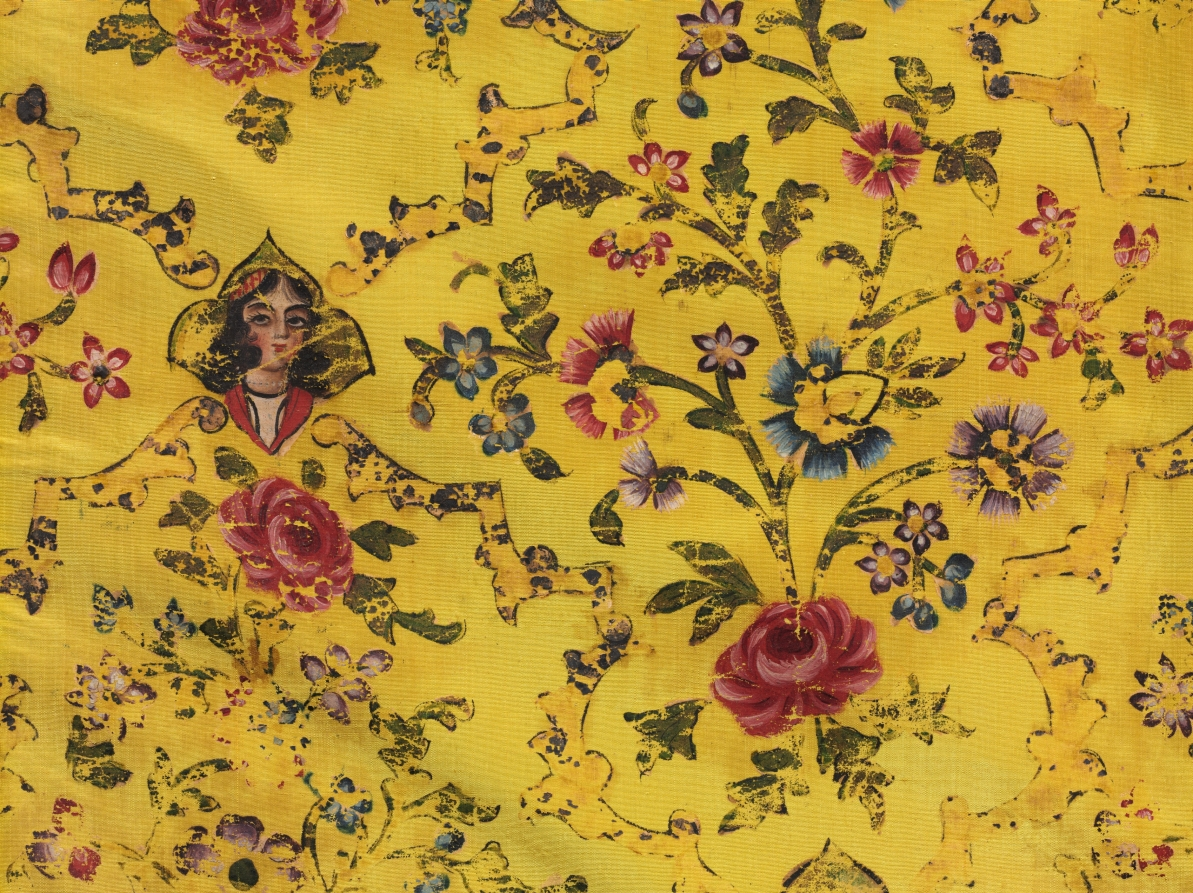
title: Wall cover with flora, peacocks, and portrait medallions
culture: Iran, Qajar period (1779-1925)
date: 1800s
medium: taffeta, hand-painted, block-printed: silk and pigments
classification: Textile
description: The European fashion of installing Chinese export silks with painted decoration as luxurious wall coverings may have inspired this exceptional Iranian silk. European engravings, which had flooded the Iranian market by the 19th century, most likely inspired the pattern. This rare silk fabric with painted figural and foliate decoration may have been a luxurious wall covering in a palace or grand mansion in the city of Kashan where mural paintings display similar 19th-century designs. Glistening silver pigment originally formed the palmette-leaf compartment outlines (now mostly deep yellow) that display colorful blossoming plants enlivened with now tarnished silver peacocks. At their junctures, portrait medallions of Iranian princesses are distinctly Qajar in attire and style, as are the composite blossoming plants.